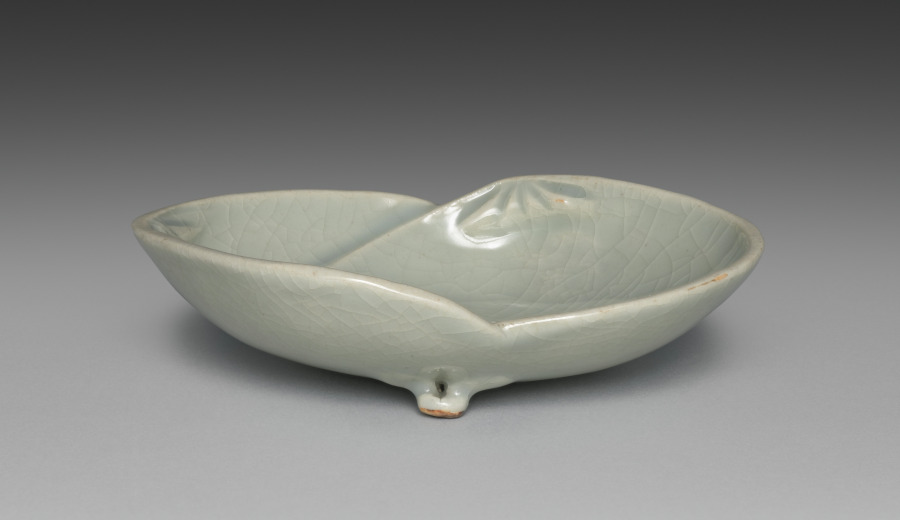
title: Dish from Dishes with Matching Shells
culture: Japan, Meiji period (1868–1912)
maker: Seifū Yohei III (Japanese, 1851–1914)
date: 1893–1914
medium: One of a pair of dishes; porcelain with celadon glaze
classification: Ceramic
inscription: 清風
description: Yohei III’s main output for his sophisticated clientele was in the form of tea sets and dining sets. He created a range of dishes in green glazes. He often produced in pairs, sets of five, or sets of ten. This pair of shell dishes have a box lid interior attestation by Yohei IV that the dishes were made by Yohei III with a cracked-ice (hyōretsu) pattern in the glaze, omitting reference to any glaze coloration.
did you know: These shell-shaped dishes are of the saucer type, suitable for dipping sauces.